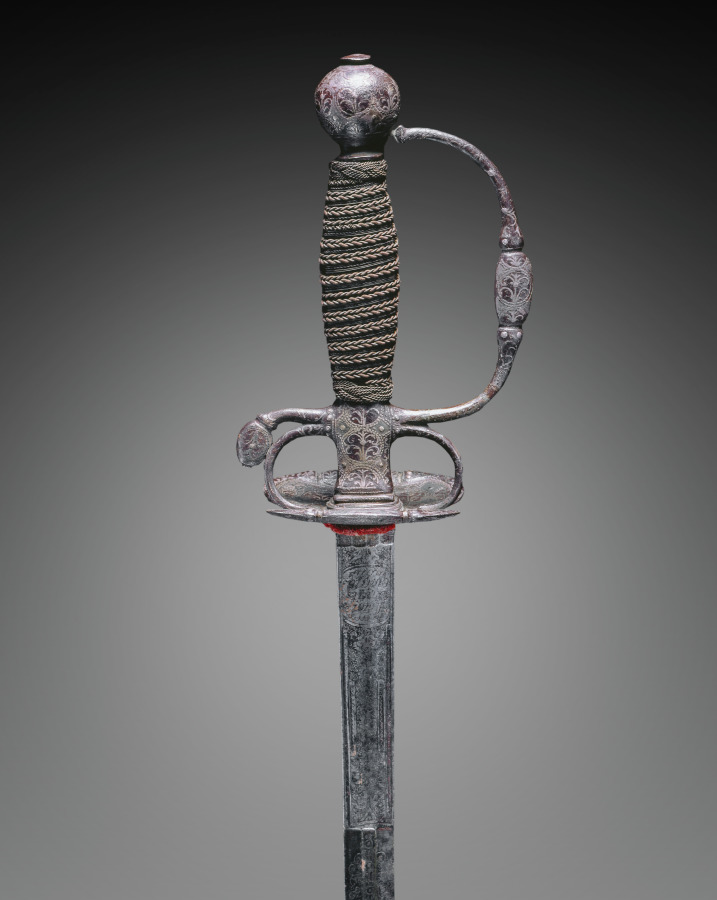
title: Small Sword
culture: Italy, 18th century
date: c. 1730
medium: steel, iron, copper wire, wood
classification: Arms and Armor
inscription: AMOR VINCIT OMNIA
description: During the 1700s, the small-sword emerged as a light, quick weapon. Like the rapier it was carried by unarmored civilians, the noblemen of the upper classes. Over time this delicate sword became more an accessory of male attire than a weapon essential to life and death. The sword hilt, which shows even when the blade is sheathed, became the ground for elaborate decoration. These small-swords thus represent the final stage in the evolution of the sword, from the edged weapons of antiquity to the elegantly refined blades of the 1700s and 1800s.